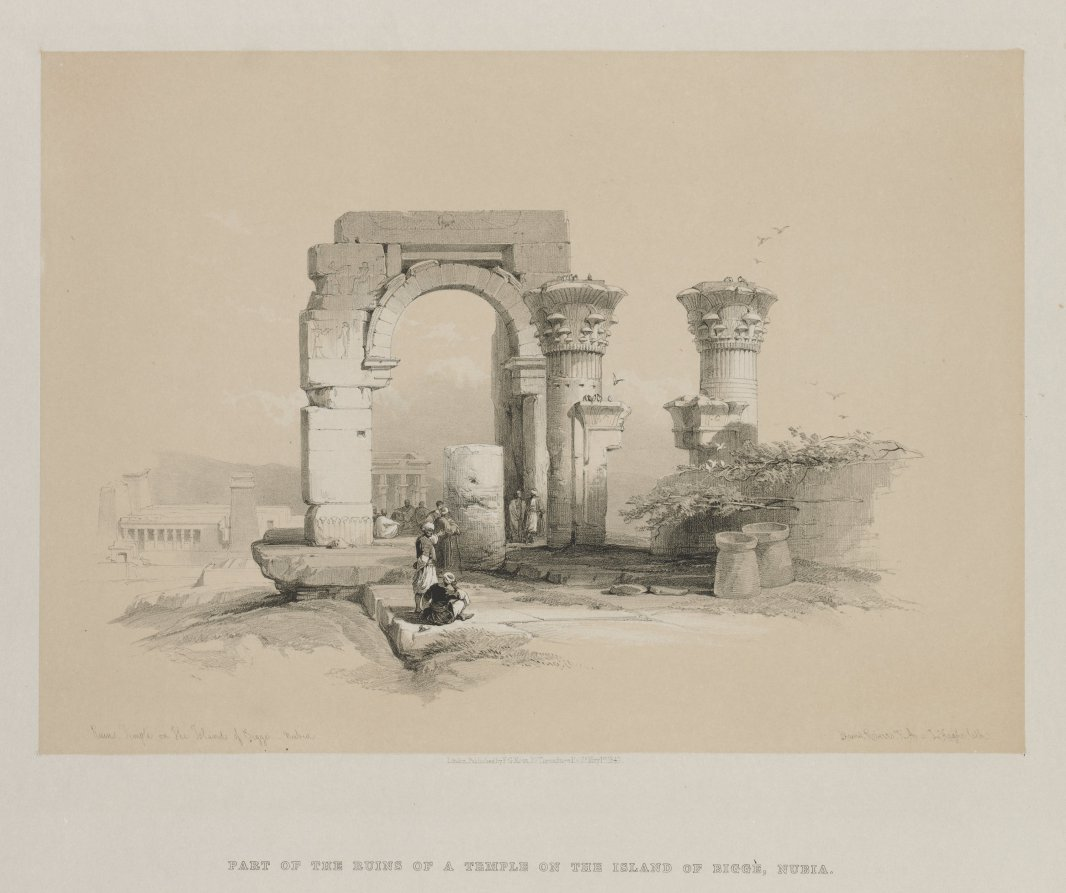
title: Egypt and Nubia, Volume II: Ruins - Temple on the Island of Biggeh, Nubia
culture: England, 19th century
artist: Louis Haghe (British, 1806–1885)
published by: F. G. Moon, 20 Threadneedle Street, London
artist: after David Roberts (Scottish, 1796–1864)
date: 1847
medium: color lithograph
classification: Print